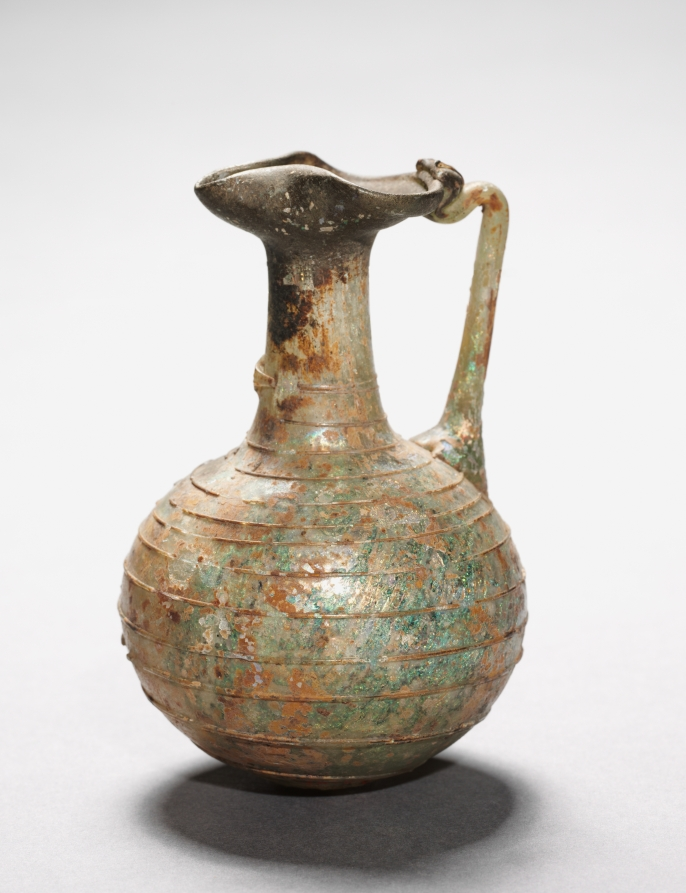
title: Pitcher with Handle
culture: Roman, Eastern Mediterranean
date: 100–400 CE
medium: glass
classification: Glass